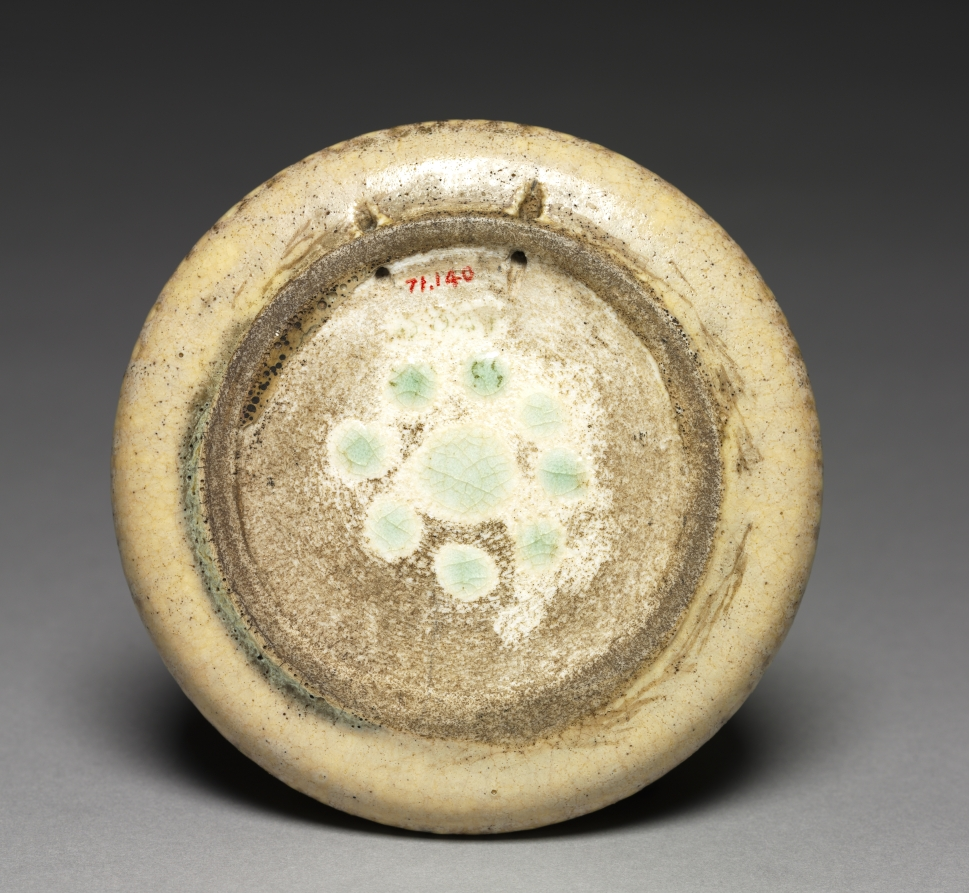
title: Dish with White and Green Cameo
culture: France, late 19th Century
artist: Taxile Maximin Doat (French, 1851–1939)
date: c. 1895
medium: stoneware and porcelain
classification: Ceramic